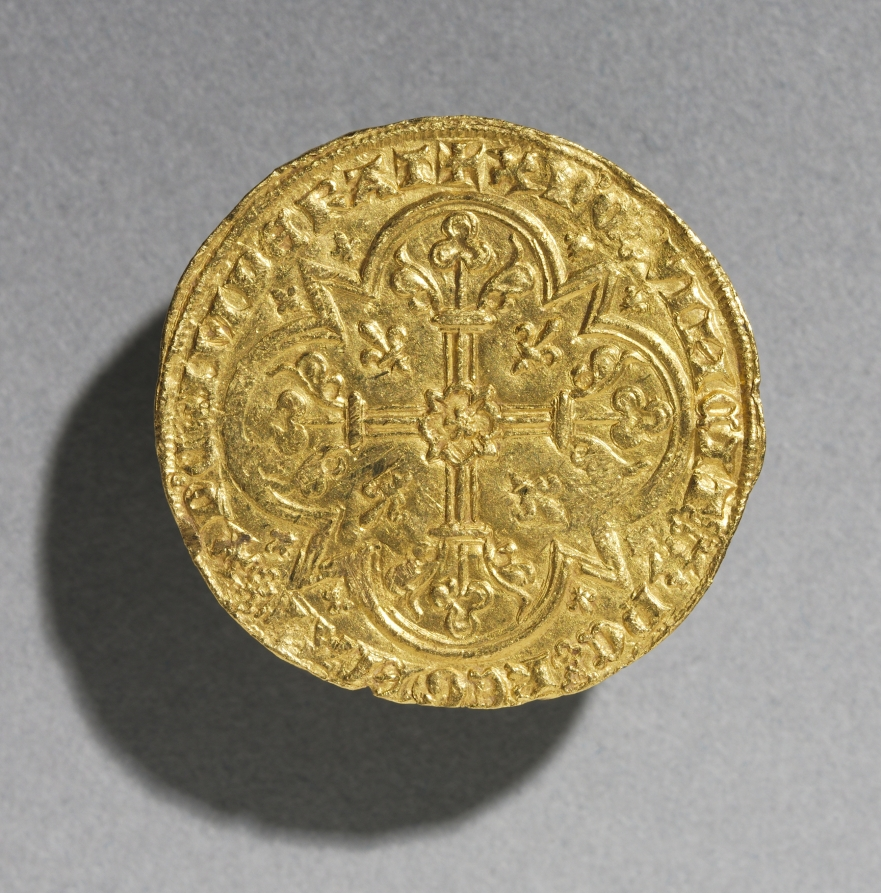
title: Mouton d'Or of King Jean le Bon of France, 1350-1364 (reverse)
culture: France, Gothic period, 14th century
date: 1350–1364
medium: gold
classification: Coins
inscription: floriate cross in tressure with a rose in the center and fleur-de-lis in four quadrants surrounded by the inscription: XPC.VINCIT.XPC.REGNAT.XPL.IMPERAT.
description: Because this gold coin represents the Paschal Lamb, a symbol of Christ, on one of its faces, it is known as a "Golden Sheep"--Mouton d'Or in French.